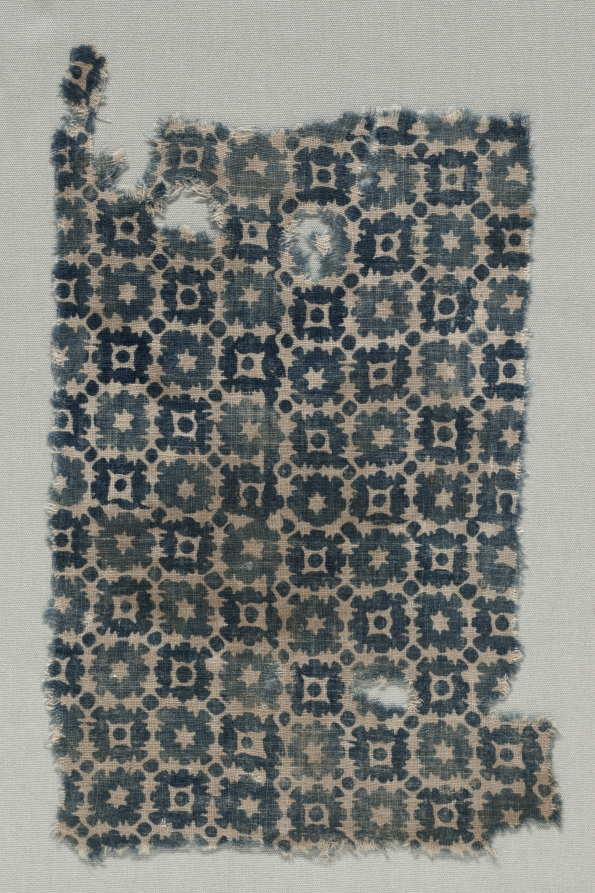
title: Fragment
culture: India, 12th-14th century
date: 1100s - 1300s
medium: plain cloth, resist dyed; cotton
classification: Textile